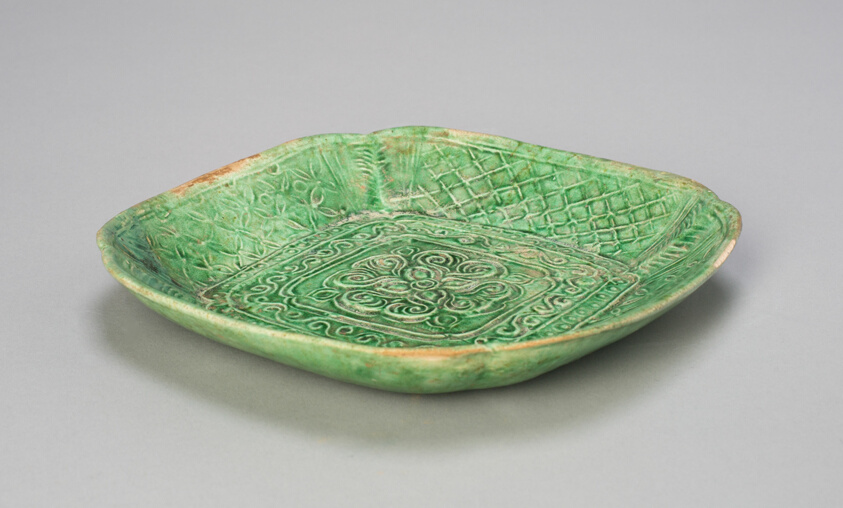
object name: Vessel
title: Square Dish with Flared, Scalloped Sides and Floral and Butterfly Design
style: Chinese (culture or style)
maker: China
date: Liao dynasty (907–1125), 11th century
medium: Earthenware with lead green glaze and underglaze molded decoration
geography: China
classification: dish (vessel); earthenware; ceramics; asian art; vessel